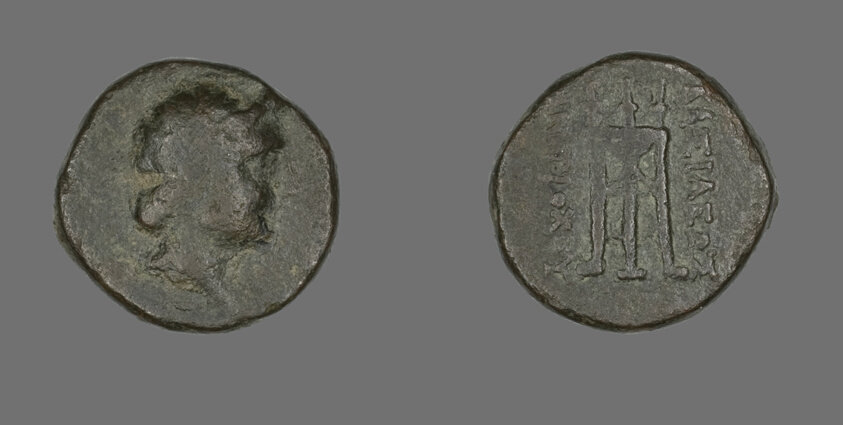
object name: Coin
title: Coin Depicting a Goddess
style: greek, ancient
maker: Greek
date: 261-246 BCE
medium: Bronze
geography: Ancient Greece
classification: coin; ancient art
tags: goddesses